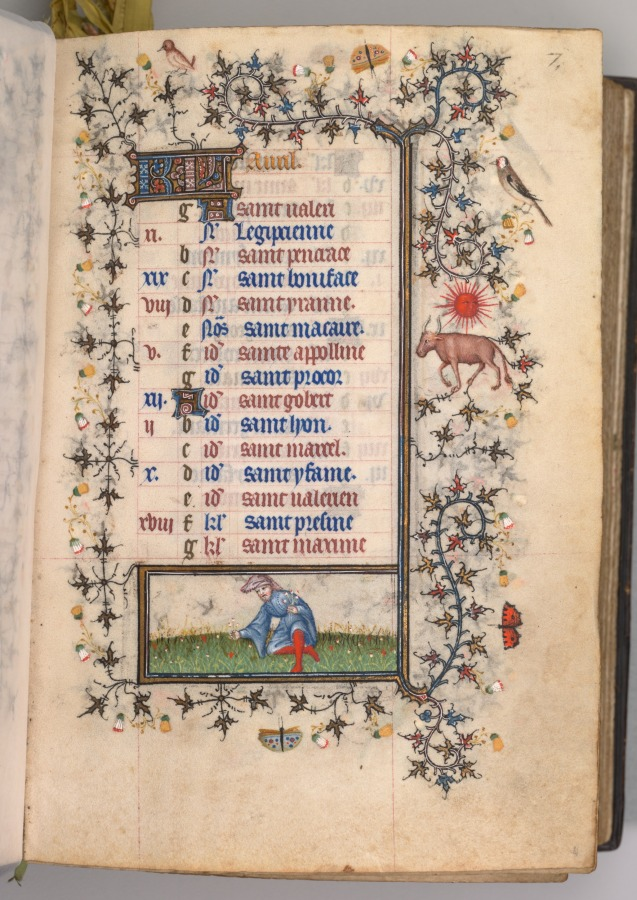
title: Hours of Charles the Noble, King of Navarre (1361-1425): fol. 4r, April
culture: France, Paris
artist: Master of the Brussels Initials and Associates (French)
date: c. 1405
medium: ink, tempera, and gold on vellum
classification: Bound Volume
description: This precious book was highly prized by its owner, Charles III, King of Navarre, a French-born prince whose coat of arms is painted on 20 folios. Charles visited Paris on numerous occasions and likely acquired this volume there in 1404. Paris was the center of the European book trade at the time and attracted illuminators from many parts of Europe. This manuscript represents one of the most remarkable fusions of French and Italian taste in book illumination. Though conforming to Parisian standards, most of the book’s major miniatures are the work of the Brussels Initials Master, an Italian illuminator who previously worked in Bologna and Padua.